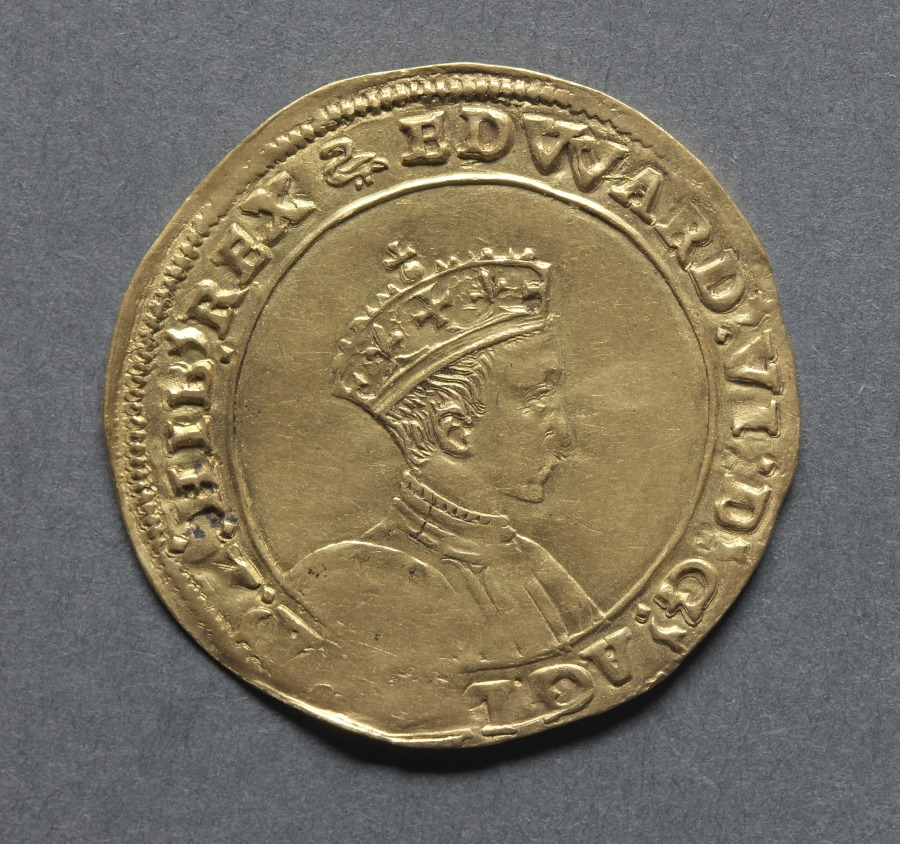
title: Half Sovereign: Edward VI (obverse); Crowned Royal Arms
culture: England, Edward VI, 1547-1553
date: 1549–50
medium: gold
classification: Coins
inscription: EDWARD. VI. D. G. AGL FRA. Z. HIBER. REX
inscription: SCUTUM DIFEI PROTEGET EUM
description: This Half Sovereign was struck at the Tower mint. Here the king is shown crowned, unlike a similar example also in the collection, 1969.175.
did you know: Edward VI was crowned king of England in 1547 was he was nine years old.